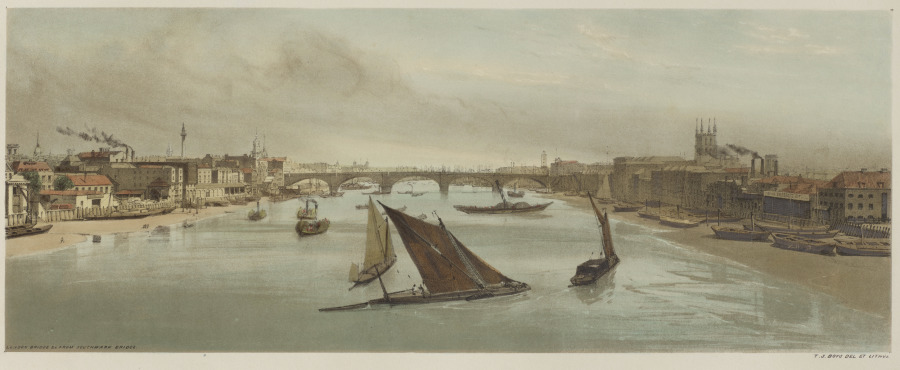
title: London As It Is: London Bridge, from Southwark Bridge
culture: England, 19th century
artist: Thomas Shotter Boys (British, 1803–1874)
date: 1842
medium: lithograph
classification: Bound Volume